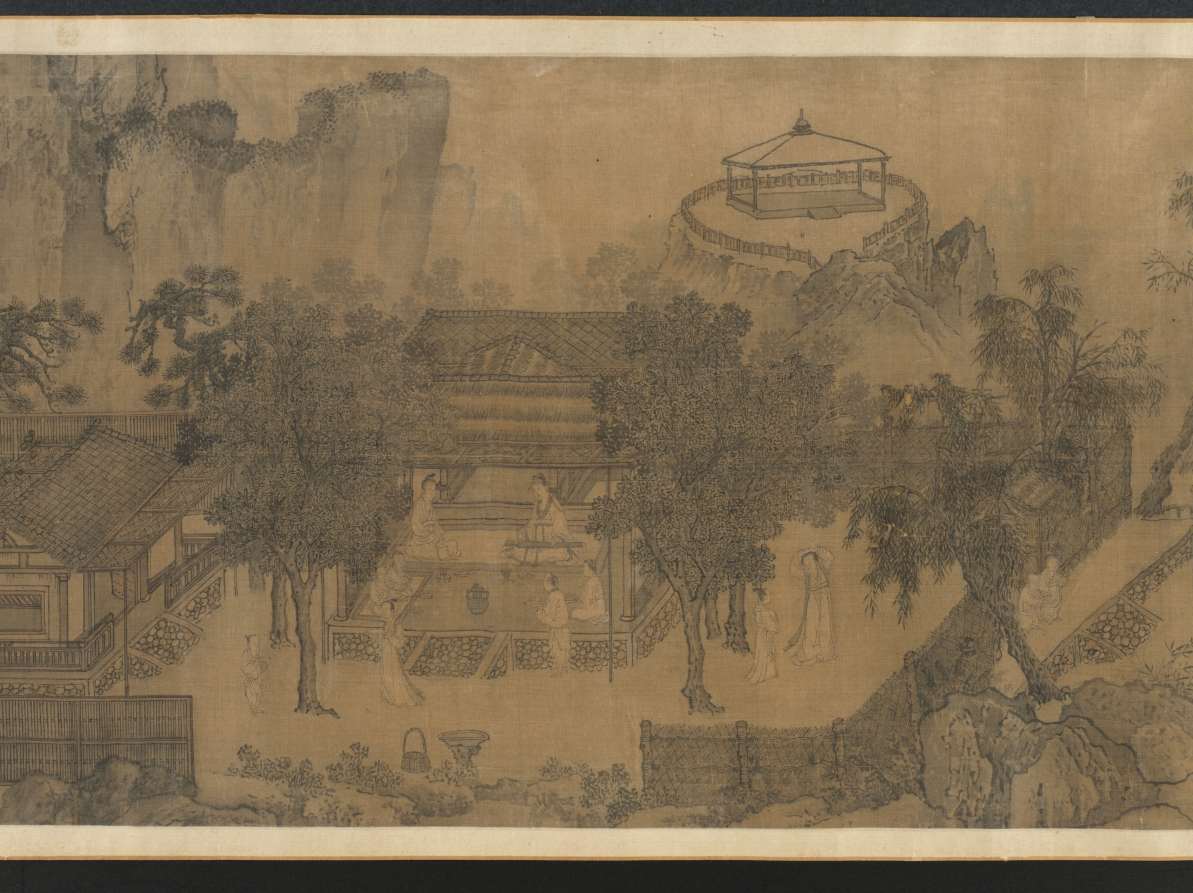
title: Tao Yuanming's Return Home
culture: China, Yuan dynasty (1271-1368)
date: 1300s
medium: Handscroll; ink and slight color on silk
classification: Painting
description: Tao Yuanming's revered poem "Return Home 歸去來辭 (Gui qu lai ci)" powerfully conveys his desire to leave bureaucratic life for the simplicity and authenticity of nature. This sentiment has deeply resonated with generations of Chinese scholars, making it a popular theme in paintings. This handscroll uses continuous narrative depicting Tao in multiple scenes from the poem. Starting on the right, the poet travels to his home. His children wait by the gate, while his wife pauses to tidy her hair before welcoming him. Then, free from the burdens of official service, Tao spends time in both nature and his cottage, where he can again enjoy wine, music, and books.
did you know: Poet Tao Yuanming 陶淵明 (c. 365–427 CE) returned to a secluded life instead of pursuing a civil service career.